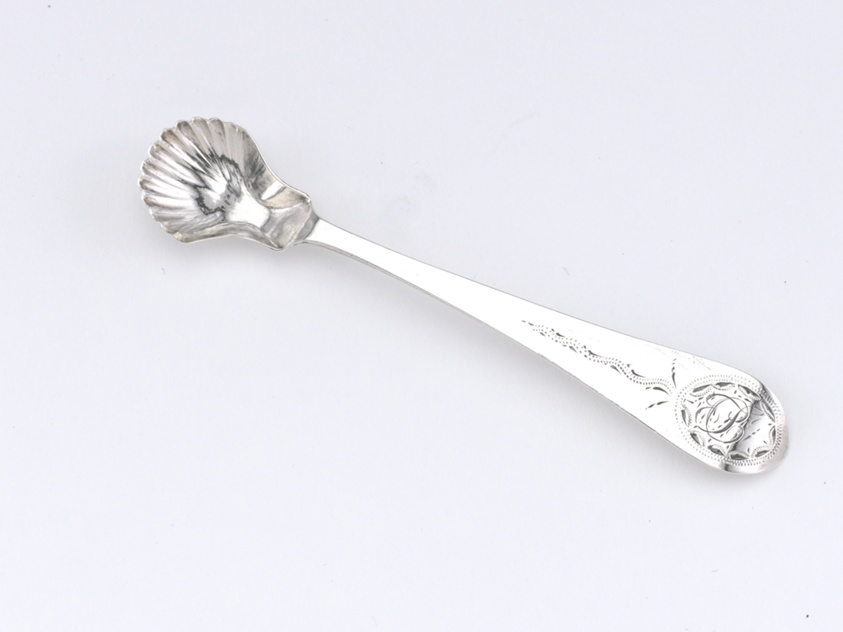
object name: Metalwork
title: Pair of Salt Spoons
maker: John Samuel Krause (American, 1782–1815); Bethlehem, Pennsylvania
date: 1805–15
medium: Silver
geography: Bethlehem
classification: spoon; silver; utensil; american decorative arts; american arts; decorative arts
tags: spoon